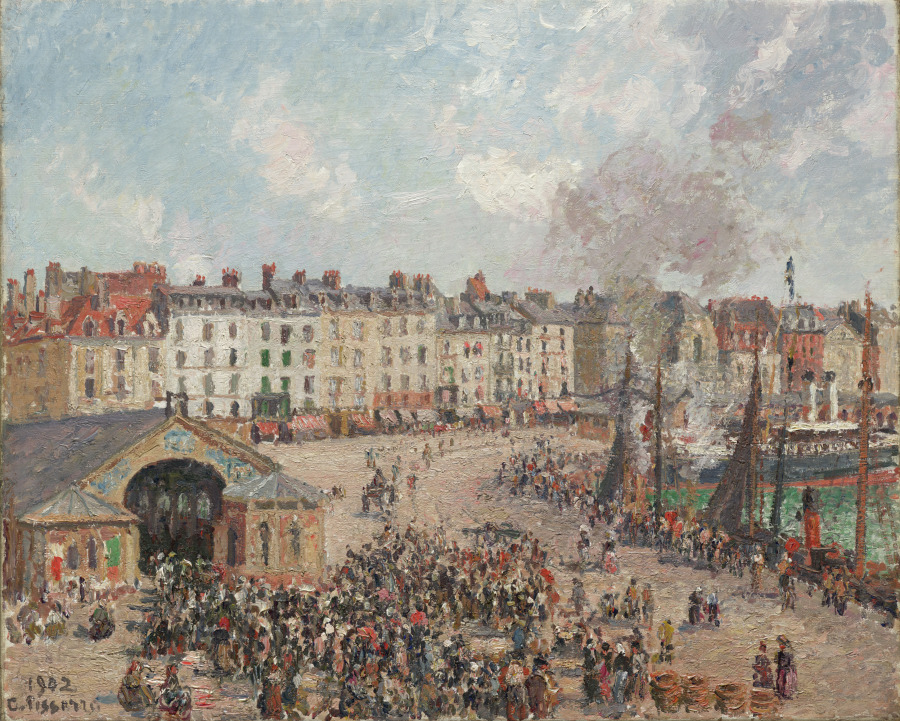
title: Fishmarket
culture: France, 20th century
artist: Camille Pissarro (French, 1830–1903)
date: 1902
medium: oil on canvas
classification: Painting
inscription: signed and dated lower left: 1902 C. Pissarro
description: This impressive view of a bustling fish market belongs to a series of paintings that Pissarro made during the summer of 1902 depicting the harbor at Dieppe. Borrowing from the Impressionist method of portraying a modern city from a high vantage point, he enlivened the scene with rich, vibrant colors applied with energetic, broken brushstrokes. Ever concerned with the fleeting effects of atmosphere, Pissarro painted the interpenetration of industrial steam with the clouds in the brilliant, sunlit sky.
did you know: Pissarro painted this work from an upper level hotel room in Dieppe. He was suffering from a recurring eye infection at the time that prevented him from working outdoors.